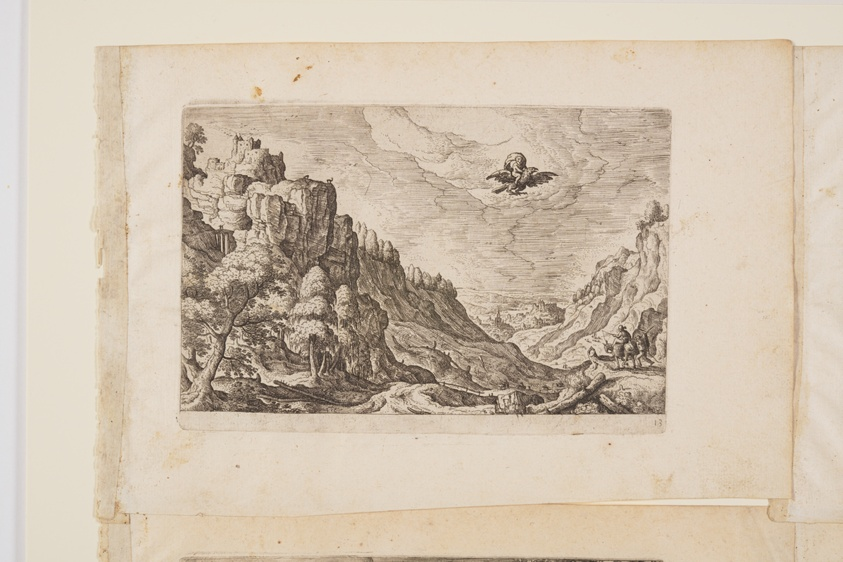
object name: Print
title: Plate 13, from Landscapes with Scenes from the Old and New Testament and Ovid’s Metamorphoses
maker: Hans Bol (Flemish, 1534–1593); published by Philip Galle (Flemish, 1537–1612)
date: 1574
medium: Etching on ivory laid paper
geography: Flanders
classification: print; paper; prints and drawing; etching